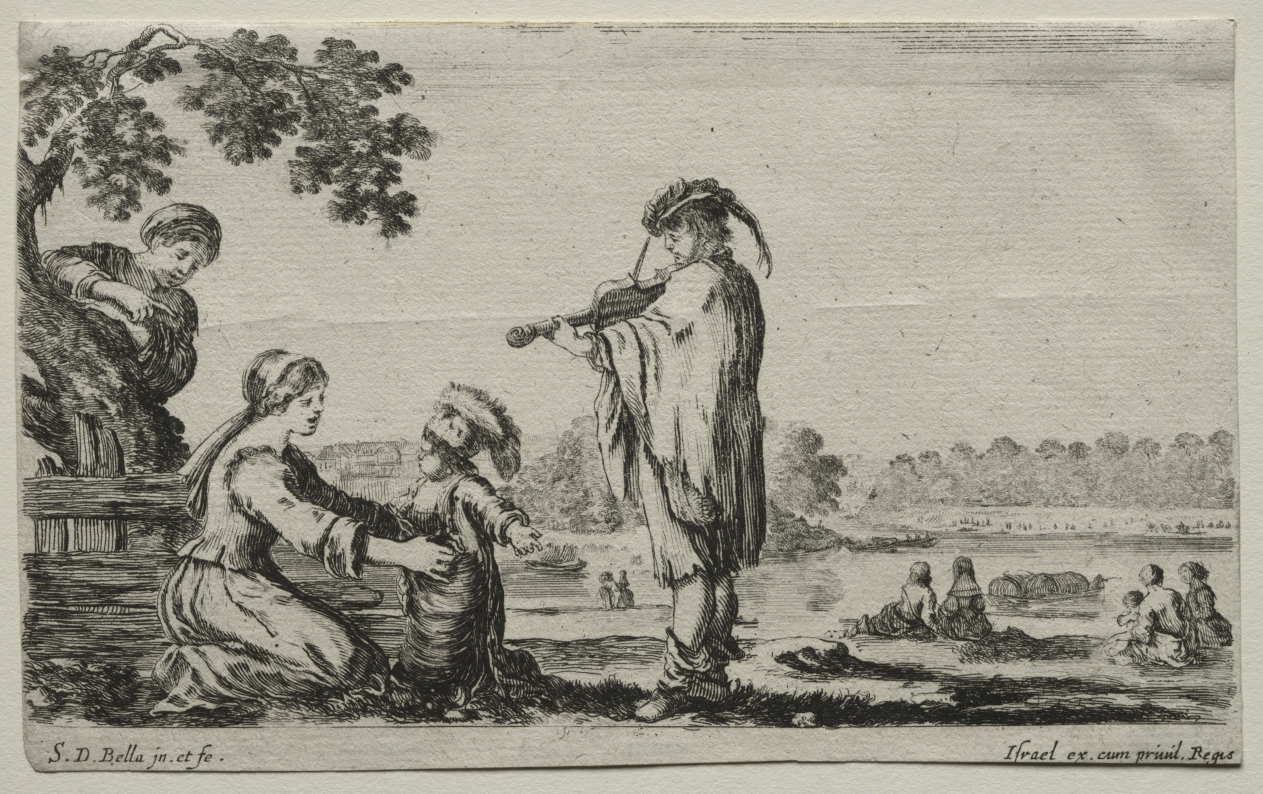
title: Various Figures and Landscapes: A Violin Player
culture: Italy, 17th century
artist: Stefano Della Bella (Italian, 1610–1664)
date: 1649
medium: etching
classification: Print